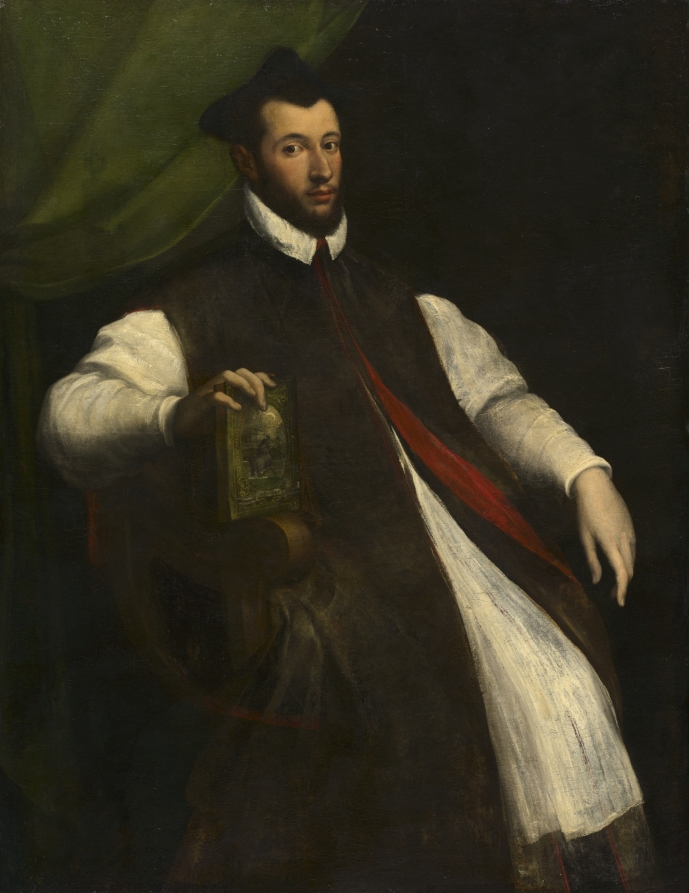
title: Portrait of a Prelate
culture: Italy, 16th century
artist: Girolamo da Carpi (Italian, c. 1501–1556)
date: mid-1500s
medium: oil on canvas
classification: Painting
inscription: Inscription on book: MUNDOS LIBENTER ASPICIT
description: Girolamo da Carpi, a court artist from Ferrara, was influenced by the grace and intellectual artificiality found in Italian Mannerist art, seen in the flowing S-curve of the sitter's clothing and his delicate and attenuated fingers. The sitter's dress identifies him as a prelate, a high-ranking member of the Catholic clergy. His costume includes a dark mantel with red lining over a gauzy, white rochet and the three-cornered hat, called a biretta. In his right hand he holds a book whose cover displays an elephant, standing in water, looking at the moon. This motif symbolized purity, and the sitter's virtue is further emphasized through the book's inscription, MUNDOS LIBENTER ASPICIT, which means, "The moon beholds the pure with pleasure." While several noble Renaissance households used this design for their family emblems, none have yet proven related to the prelate in this painting and so his identity remains unknown.